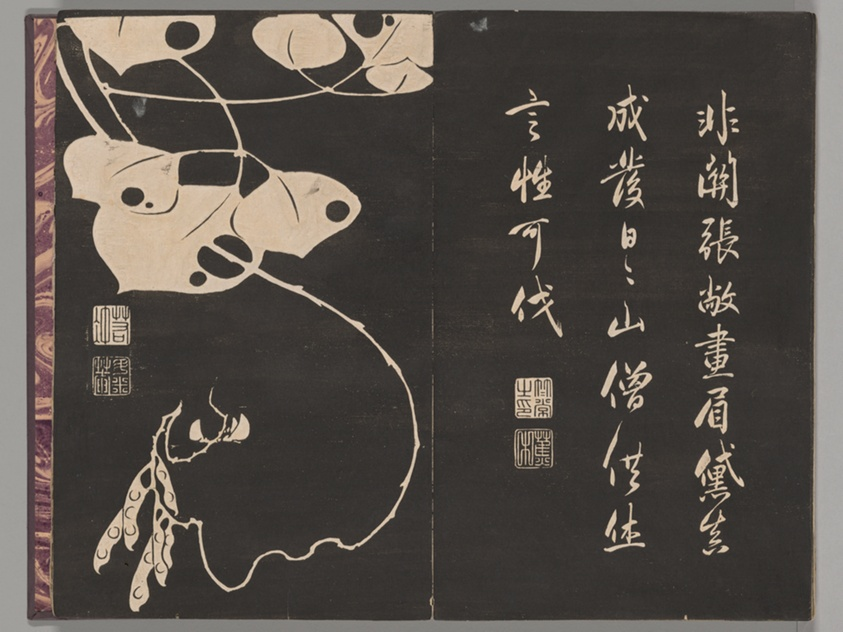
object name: Book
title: Soken sekisatsu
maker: Ito Jakuchu (Japanese, 1716-1800)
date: 1767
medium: Woodblock printed book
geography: Japan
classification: book